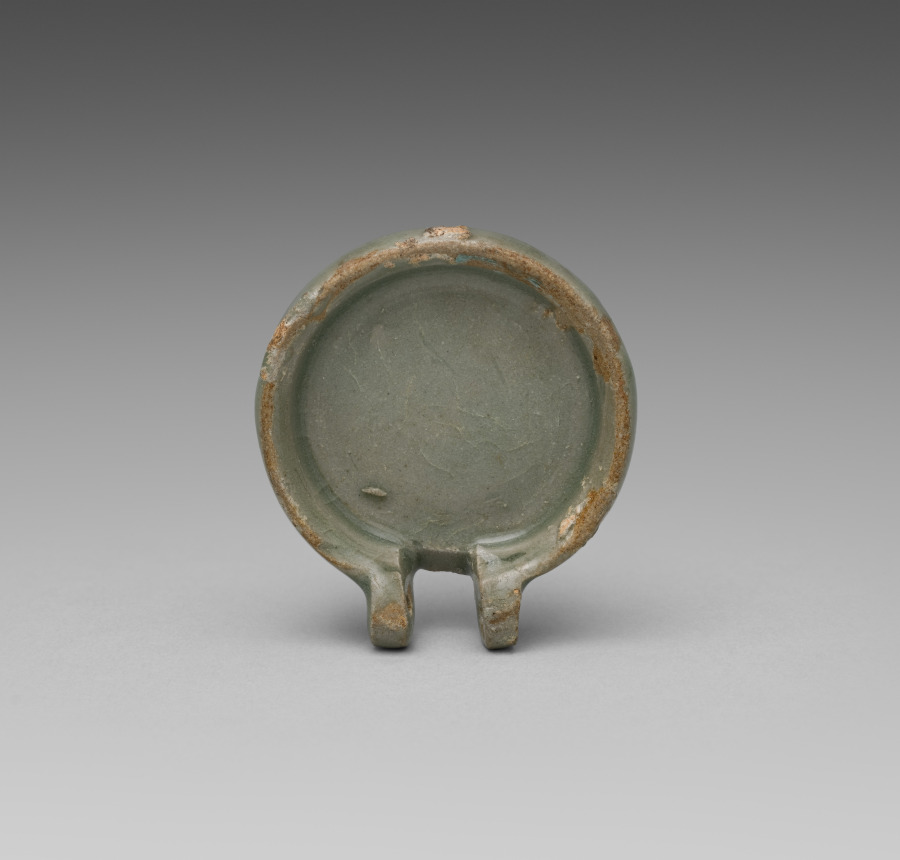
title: Water Ewer for Rituals with Incised Parrot Design (lid)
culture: Korea, Goryeo dynasty (918–1392)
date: 1100s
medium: stoneware with celadon glaze, incised and carved decoration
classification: Ceramic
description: This distinctively shaped celadon vessel is a kundika. With a spout on one side, this type of vessel is often used in Buddhist purification rituals. Unlike most existing examples that have an image of a willow tree, this work has a rare flying phoenix design incised on its surface.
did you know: This distinctively shaped vessel is called a kundika in Sanskrit, simply referring to a water bottle.